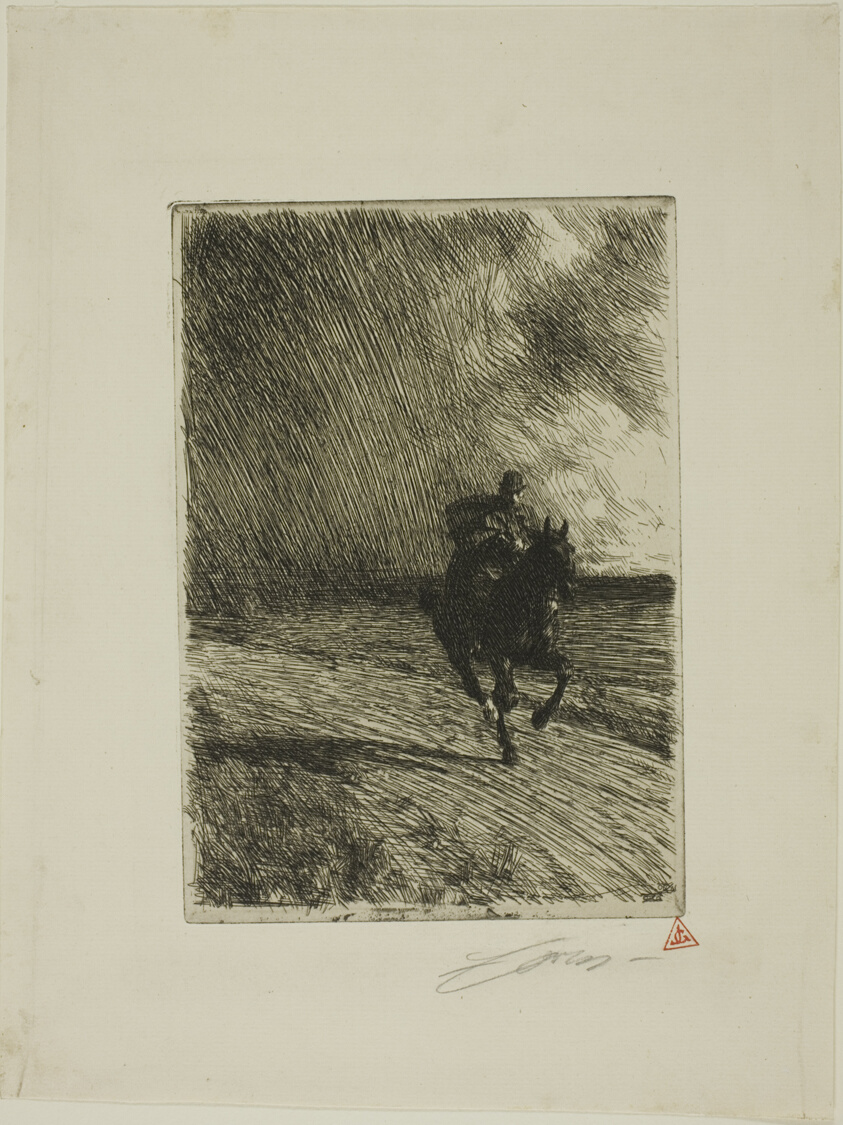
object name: Print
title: Storm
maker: Anders Zorn (Swedish, 1860-1920)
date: 1891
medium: Etching on ivory laid paper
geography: Sweden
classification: etching; print; prints and drawing